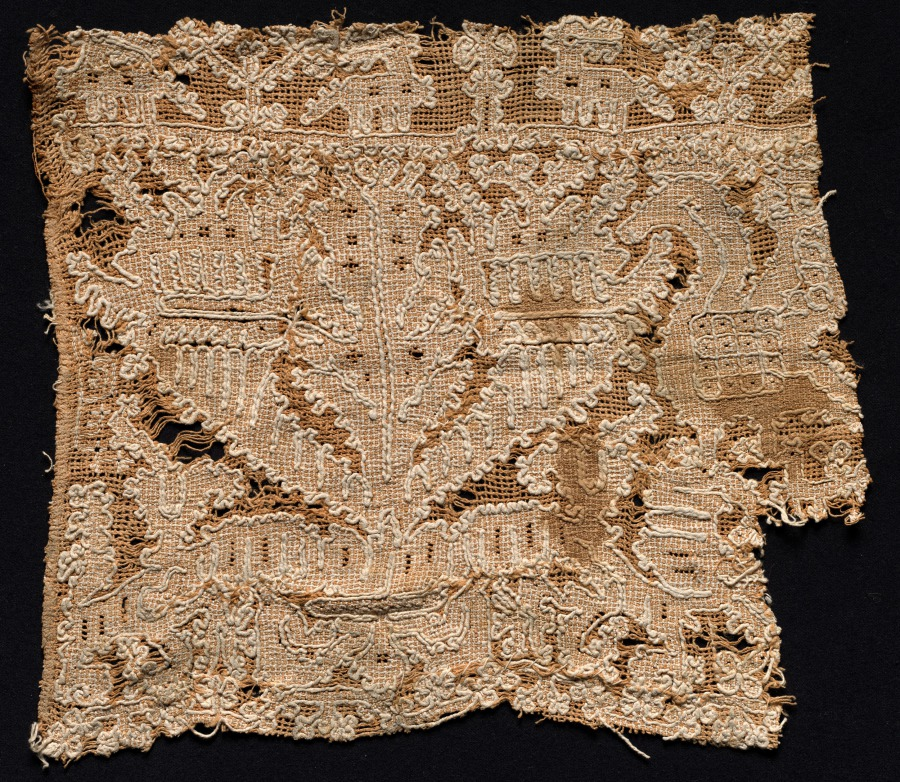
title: Fragment with Animal and Vegetal Motifs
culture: Italy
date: 1500s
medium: Unbleached and bleached linen (est.): needle lace, burato (twined ground and darned in two directions)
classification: Lace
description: The dark yellow of the unbleached linen ground allows for the pattern, worked in bleached linen in the burato technique, to prominently stand out. A thicker white thread outlines the design of stags in the top register, the vegetal motifs throughout, and the griffin or crowned eagle on the right.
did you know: The word lace derives from the Latin laqueus, meaning noose.